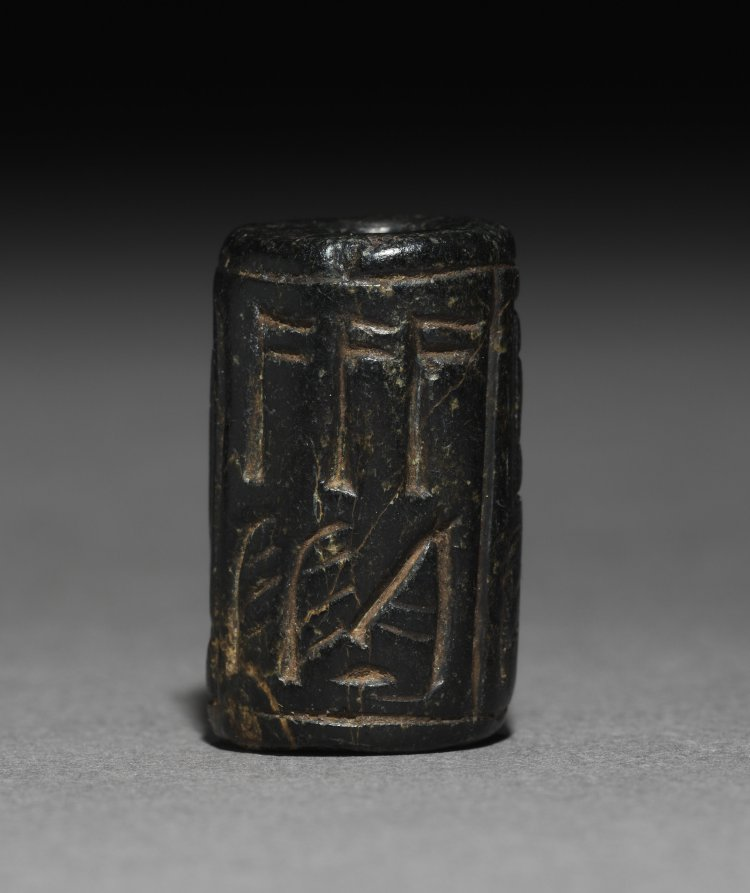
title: Cylinder Seal of Mycerinus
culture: Egypt, Old Kingdom (2647–2124 BCE), Dynasty 4, reign of Menkaure (2532–2503 BCE)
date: 2573–2124 BCE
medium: serpentinite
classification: Scarabs